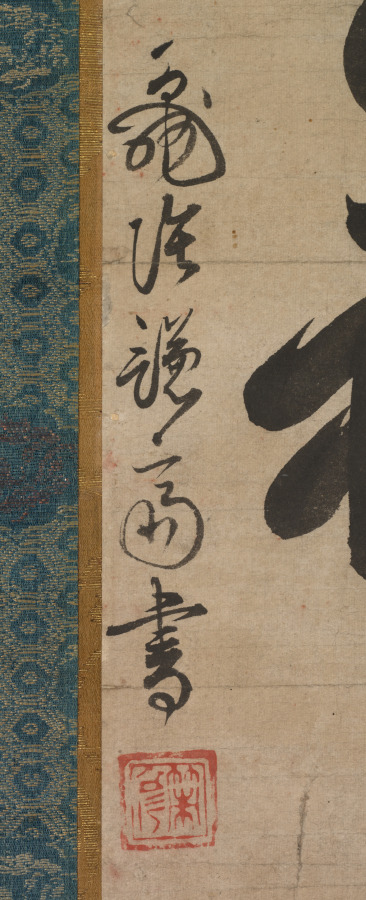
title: Sacred Name of Tenjin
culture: Japan, Muromachi period (1392–1573)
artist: Sakugen Shūryō (Japanese, 1501–1579)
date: 1500s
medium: hanging scroll; ink on paper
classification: Calligraphy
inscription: signed: signature unread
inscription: Sealed: Sakugen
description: The story emerged in the early 1300s that the kami Tenjin had traveled to China and achieved enlightenment under a famous Buddhist meditation master. Paintings of the subject as well as written invocations of Tenjin’s name were highly valued by the monks of Japan’s Zen Buddhist communities, to which an invocation of Tenjin’s name brushed by Zen monk Sakugen Shūryō attests. Sakugen was both a poet and an official envoy to Ming China in the 1500s. Creating calligraphies of deities’ names was akin to painting religious icons.